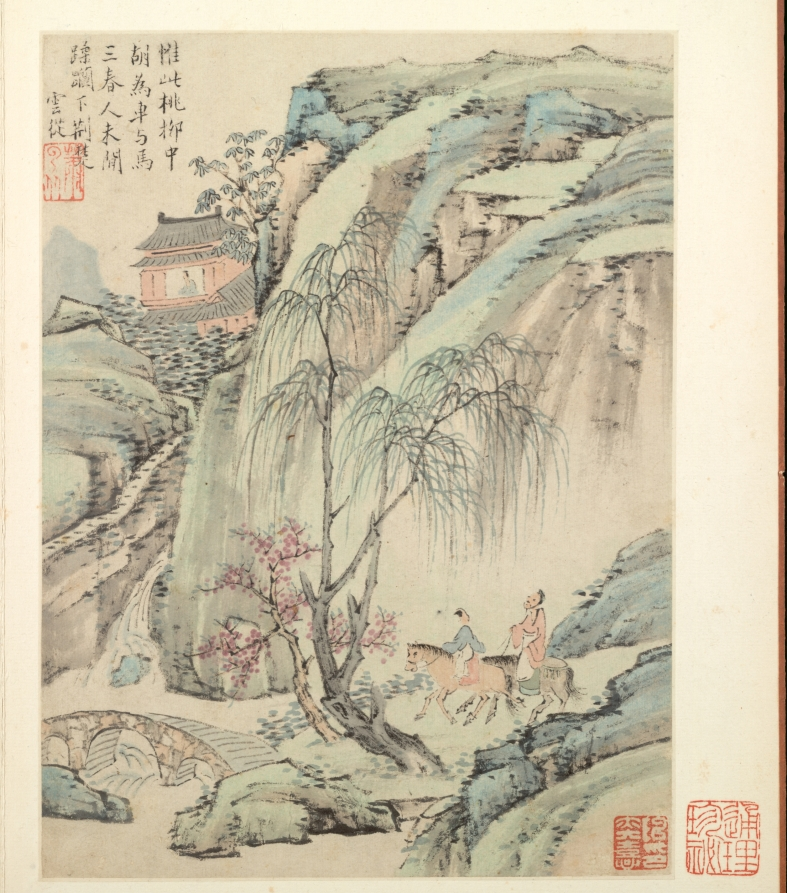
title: Album of Seasonal Landscapes, Leaf B (previous leaf 1)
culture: China, Qing dynasty (1644–1911)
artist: Xiao Yuncong (Chinese, 1596–1673)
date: 1668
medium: album leaf; ink and light color on paper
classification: Painting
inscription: Artist's inscription, signature, and 8 seals. Leaf A. Alas why among these peach and willow trees,/ Are there so many carriages and horses?/ In spring, the people do not sit idle -/ They tramp down all the bushes. Yuncong [seal] Xiao Yuncong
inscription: 9 additional seals: 2 of Chen Yixi 陳奕禧 (1646-1709); 4 of Li Yufen 李玉棻 [Li Yunhu 李韵湖] (active mid-1800s); 3 unidentified.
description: Throughout his lifetime, Xiao Yuncong visited Nanjing and Yangzhou, cities embedded in the fertile and water-rich Jiangnan region, as reflected in his paintings. Xiao painted from nature, and his landscapes are informed by the seasons and his travels, as well as by his experience as a print designer. Xiao’s fresh, light colors continue to appear in later Shanghai school paintings. This album was formerly in the collection of Li Yufen in Yangzhou and then owned by Wu Hufan in Shanghai. While the artist impressed his seal consistently below his poetic inscriptions in the upper parts of the composition, the red seals on the margins and in the lower corners of the paintings are impressions by the album’s previous owners.